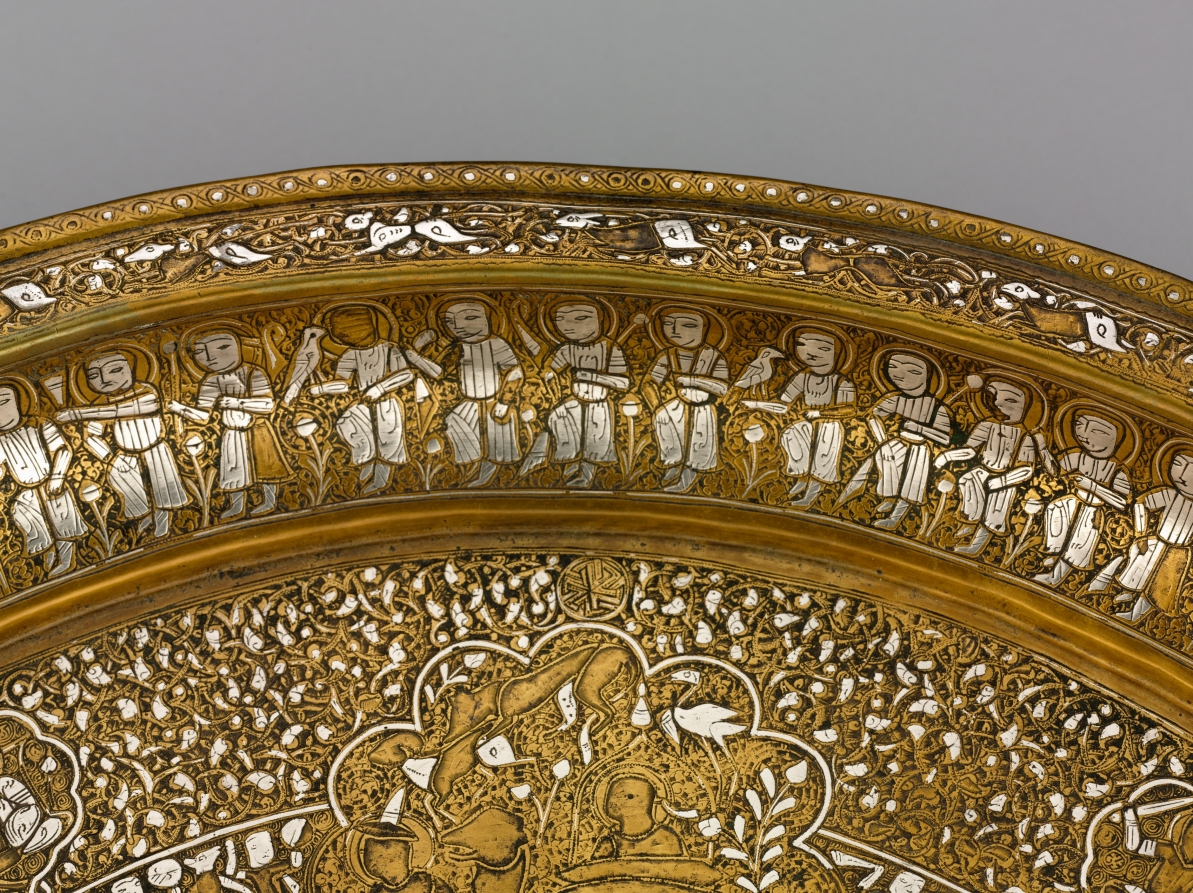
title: Tray Portraying Courtly Pleasures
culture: Syria, Ayyubid period (1171–1260)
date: 1240s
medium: sheet brass inlaid with silver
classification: Metalwork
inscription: The presence of ligatures in the narrow circular bands with interconnected human and animal figures suggests this may be a degenerate form of animated script. It is indecipherable.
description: This tray features images of courtly life interspersed with astronomical symbols. The scenes contained within large multilobed medallions display an enthroned prince with lions at his feet, a banquet, a hunt, dancers, and musicians. Contained within the concentric circles there are also references to solar and lunar motifs, including figures holding sunbursts and lunar crescents. This tray is made of a single sheet of brass and the silver inlay, which is best preserved on the tray’s inner curve, suggests its original brilliance.